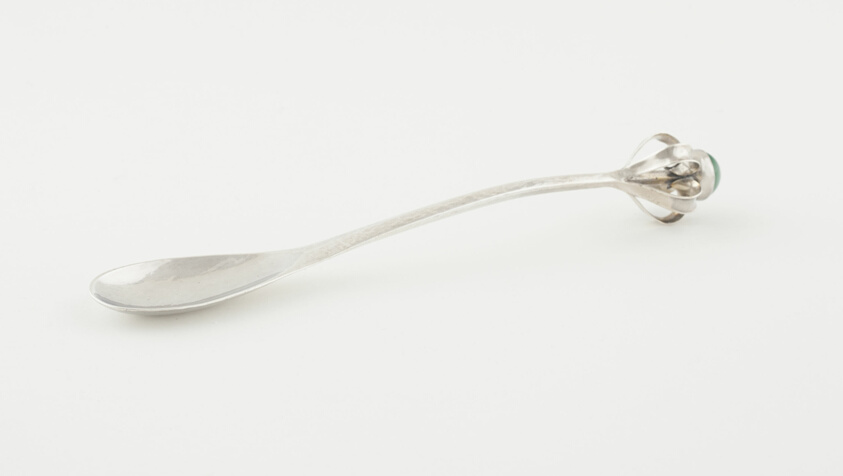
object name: Metalwork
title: Spoon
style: Arts and Crafts Movement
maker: Designed by Charles Robert Ashbee; English, 1863-1942; Made by the Guild of Handicraft Ltd.; England, 1888-1908; Chipping Campden, Gloucestershire, England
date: 1903/04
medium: Silver with dyed green chalcedony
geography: Chipping Campden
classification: silver; metalwork; european decorative arts